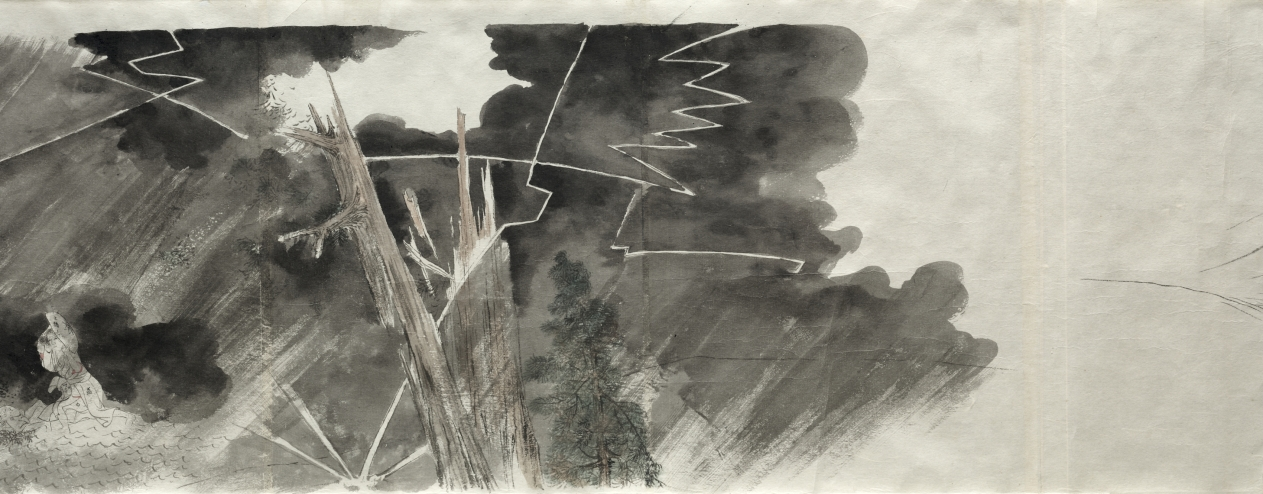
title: Sketch Copy of Natural Disasters, from the Seven Fortunes and Misfortunes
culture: Japan, Edo period (1615–1868) to Meiji period (1868–1912)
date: after 1773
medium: handscroll; ink and color on paper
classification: Painting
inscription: Signed: Gettcho; dated 1773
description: This unmounted handscroll is a copy of the first of a three-scroll set painted by Maruyama Ōkyo (1733–1795) for Buddhist monk Yujō (1723–1773). It depicts people's unfortunate encounters with forces of nature from wind to beasts. Ōkyo's realistic, contemporary imagery was meant to evoke a sense of recognition and empathy in viewers, shocking them into avoidance of possible punishments.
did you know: Notations that appear throughout the scroll indicate colors and other details of the original painting.